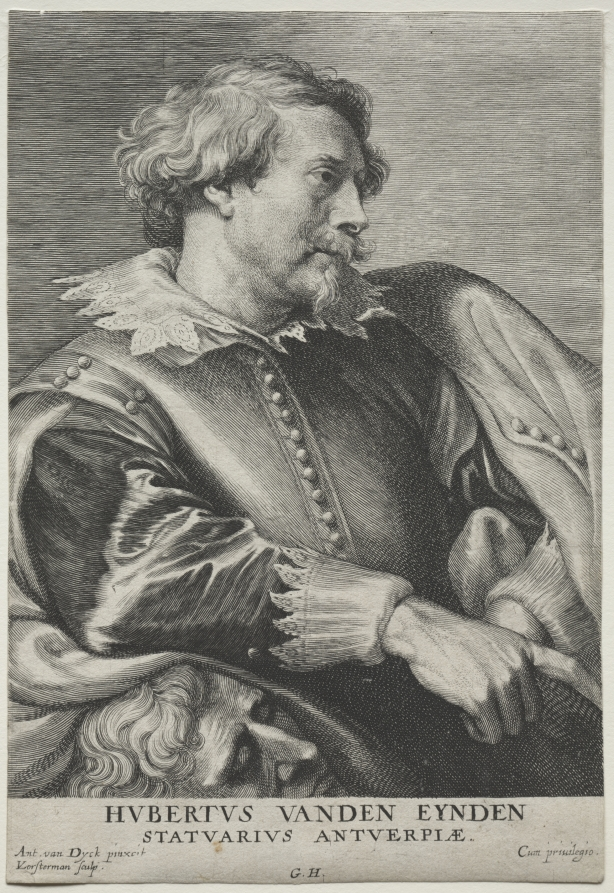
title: Hubert van den Eyden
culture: Flanders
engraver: Lucas Emil Vorsterman (Flemish, 1595–1675)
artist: after Anthony van Dyck (Flemish, 1599–1641)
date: 1630–33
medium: etching and engraving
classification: Print